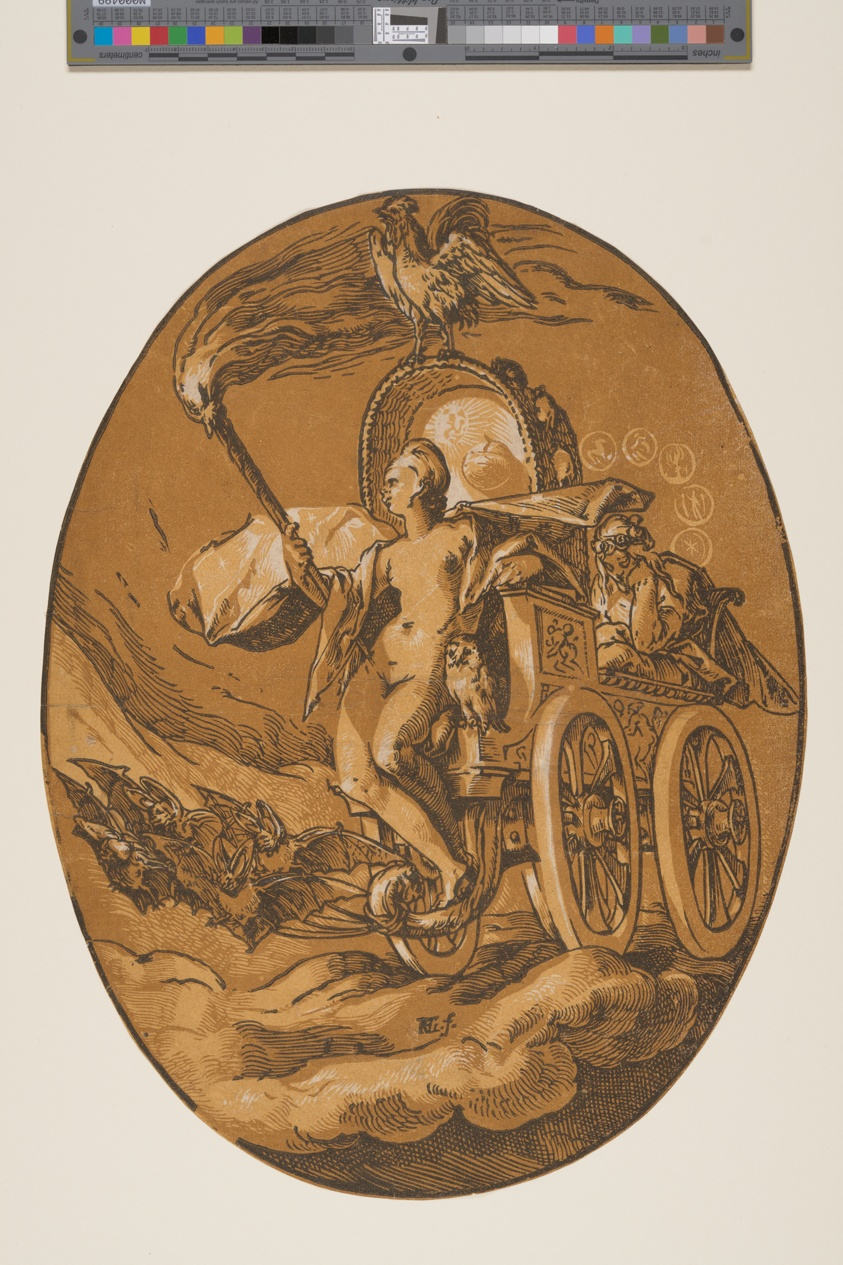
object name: Print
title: Nox, from The Deities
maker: Hendrick Goltzius (Dutch, 1558–1617)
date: 1588/90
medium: Chiaroscuro woodcut from three blocks in ochre and brown on ivory laid paper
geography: Netherlands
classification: print; paper; prints and drawing; woodcut